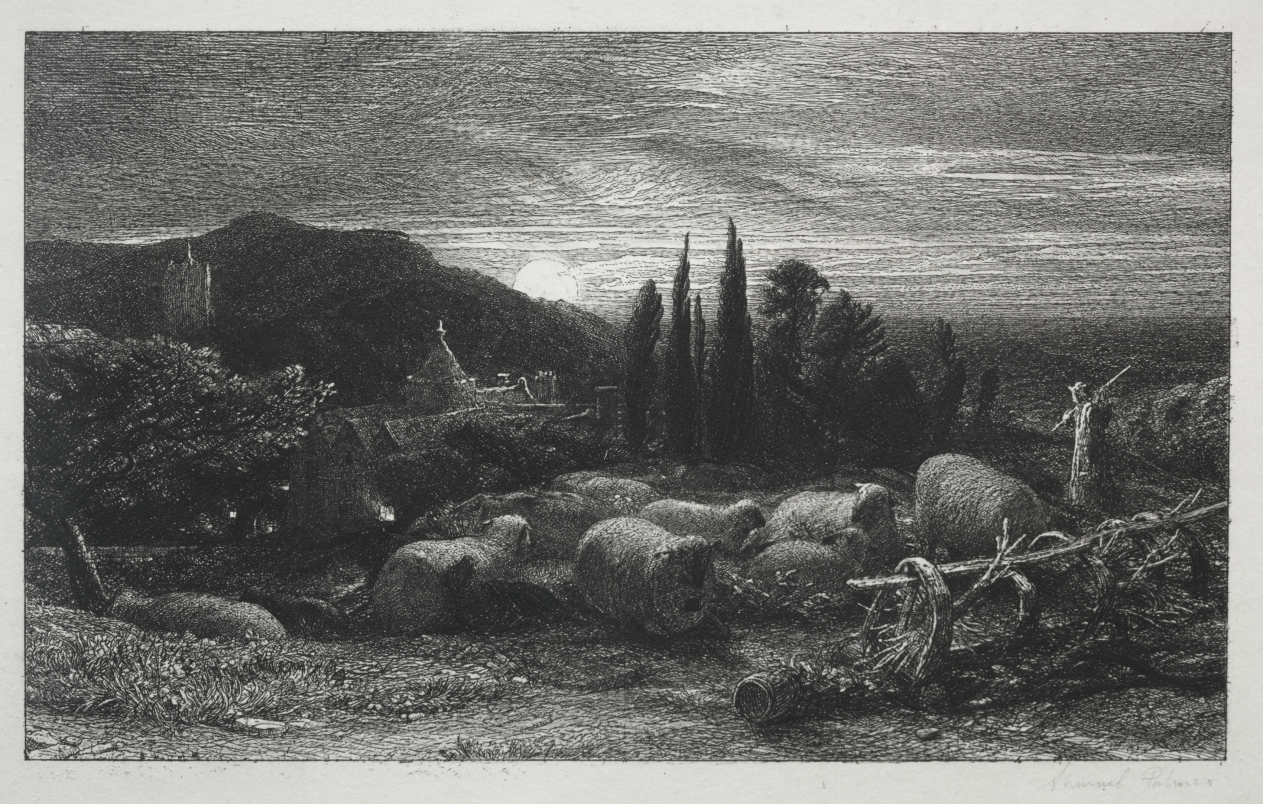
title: The Rising Moon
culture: England, 19th century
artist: Samuel Palmer (British, 1805–1881)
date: 1857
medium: etching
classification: Print